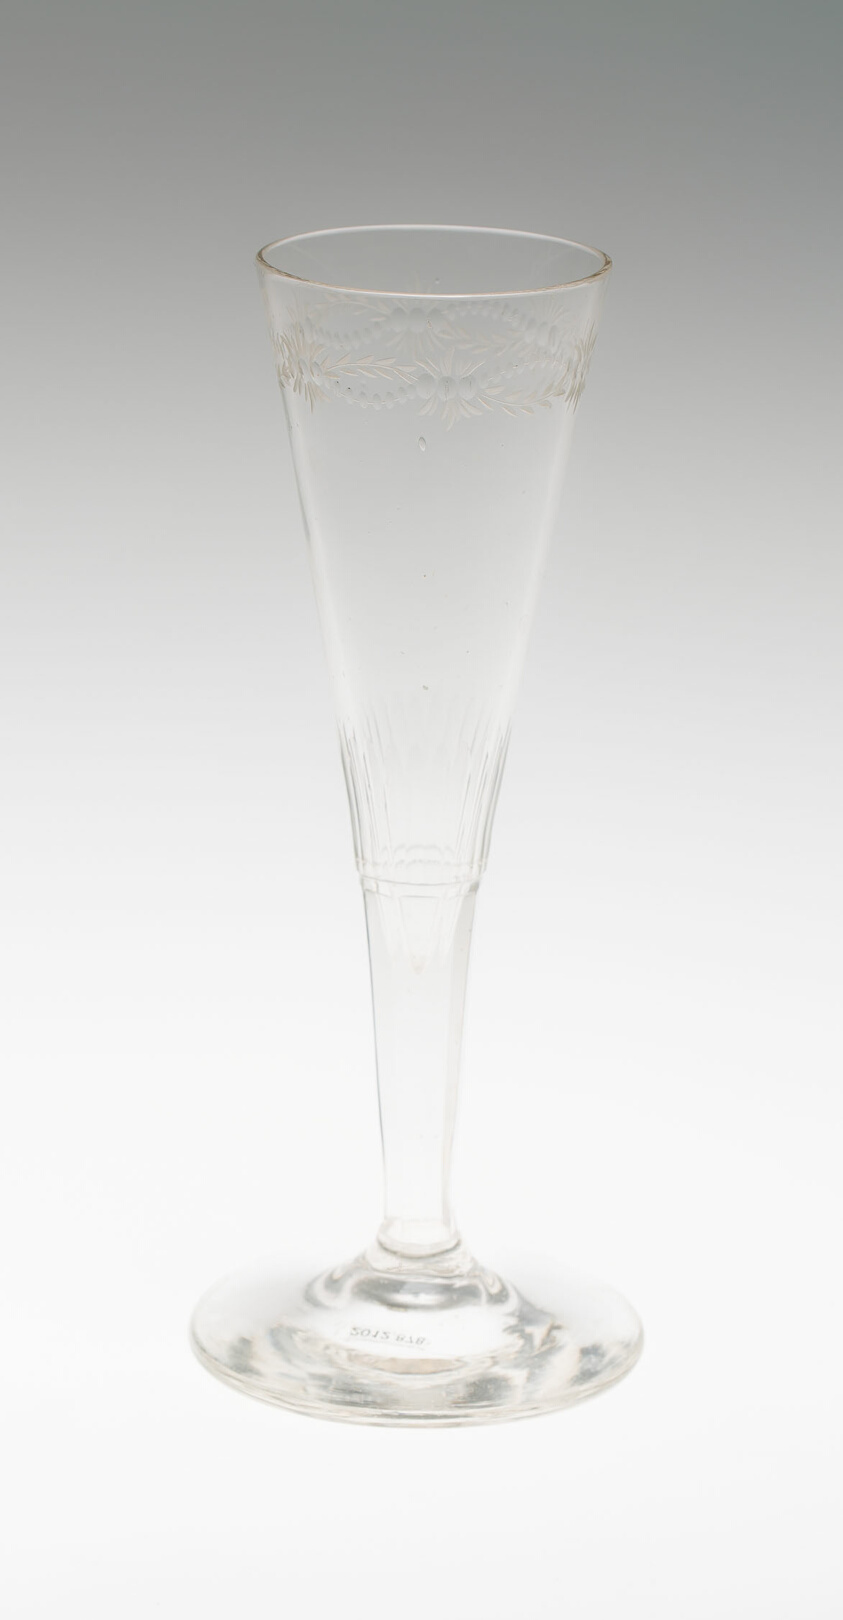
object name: Glass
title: Flute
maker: Probably France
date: 1850/90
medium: Glass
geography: France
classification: glass